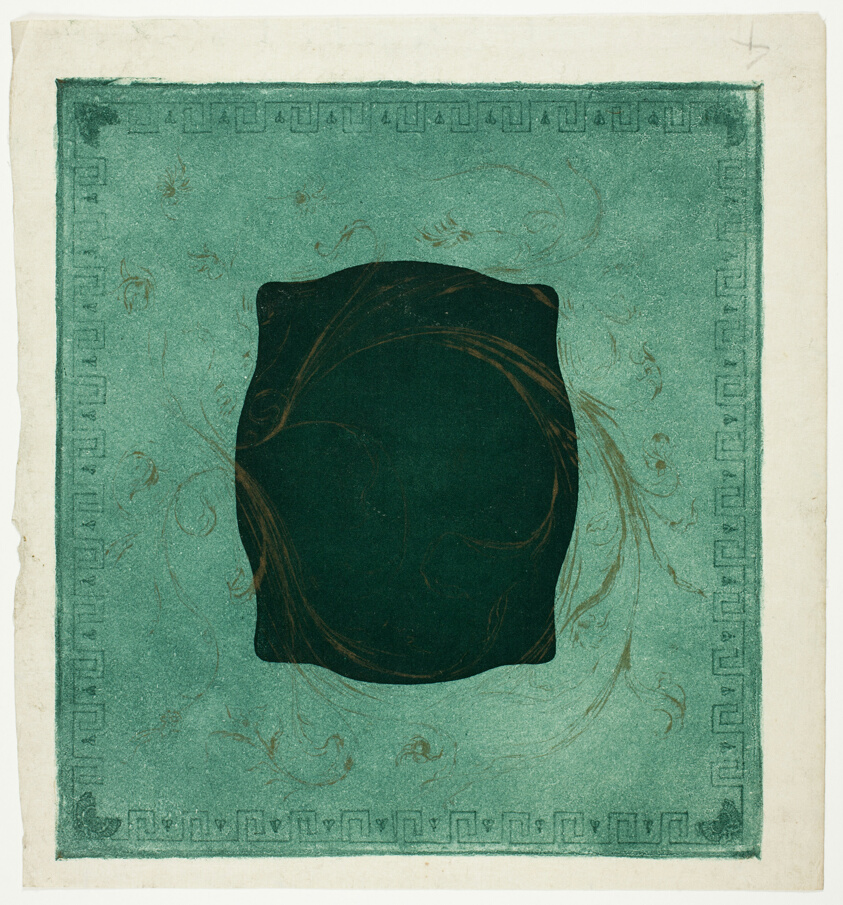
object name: Print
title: Mount for Last Poppies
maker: Theodore Roussel (French, worked in England, 1847-1926)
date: 1897–99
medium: Drypoint, aquatint, softground and lavis in blue-green and yellow-brown metallic on ivory Japanese paper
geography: England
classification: drypoint; print; prints and drawing